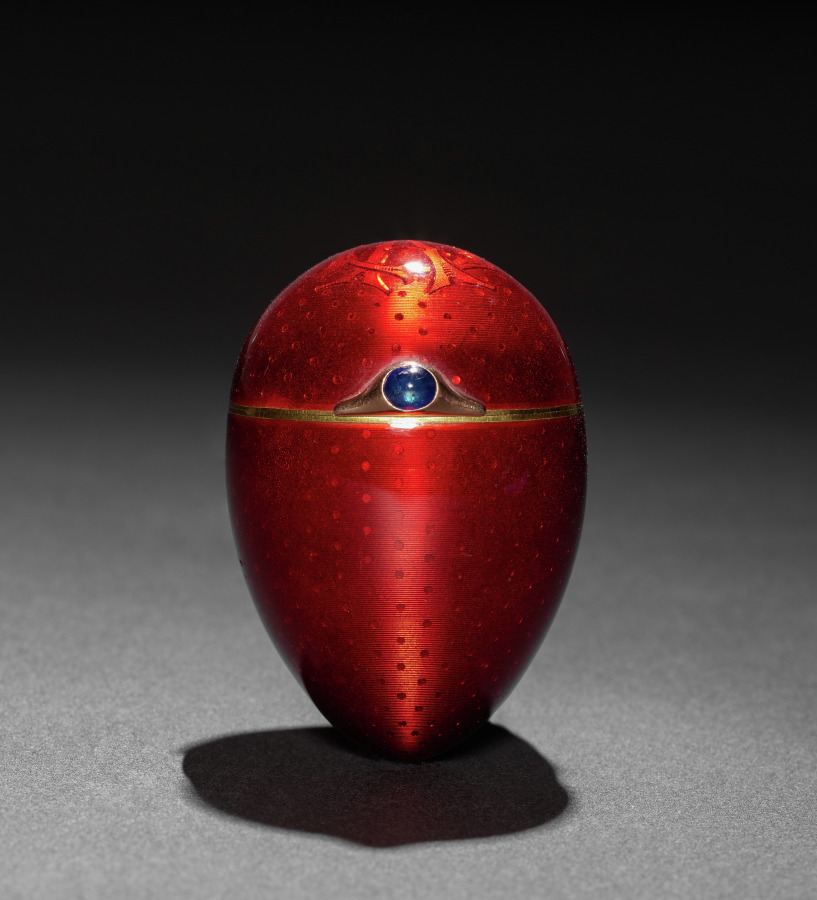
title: Egg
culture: Russia, St. Petersburg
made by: Alexander Edward Tillander (Russian, 1837–1918)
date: before 1896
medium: gold, enamel, sapphire, gold easel and stand, photograph covered with faceted green glass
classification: Miscellaneous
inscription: engraved beneath the enamel of the top are the Cyrillic letters "XB" [in monogram] which signify the phrase, "Christ is risen."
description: In the Russian Orthodox religious tradition, eggs are offered as Easter gifts to symbolize rebirth, renewal, and the resurrection of Christ. This jeweled Russian egg is engraved with XB symbolizing the phrase, “Christ is risen,” and would have been given to a lady in a wealthy household, perhaps someone of high rank within the imperial court, given the richness of materials.